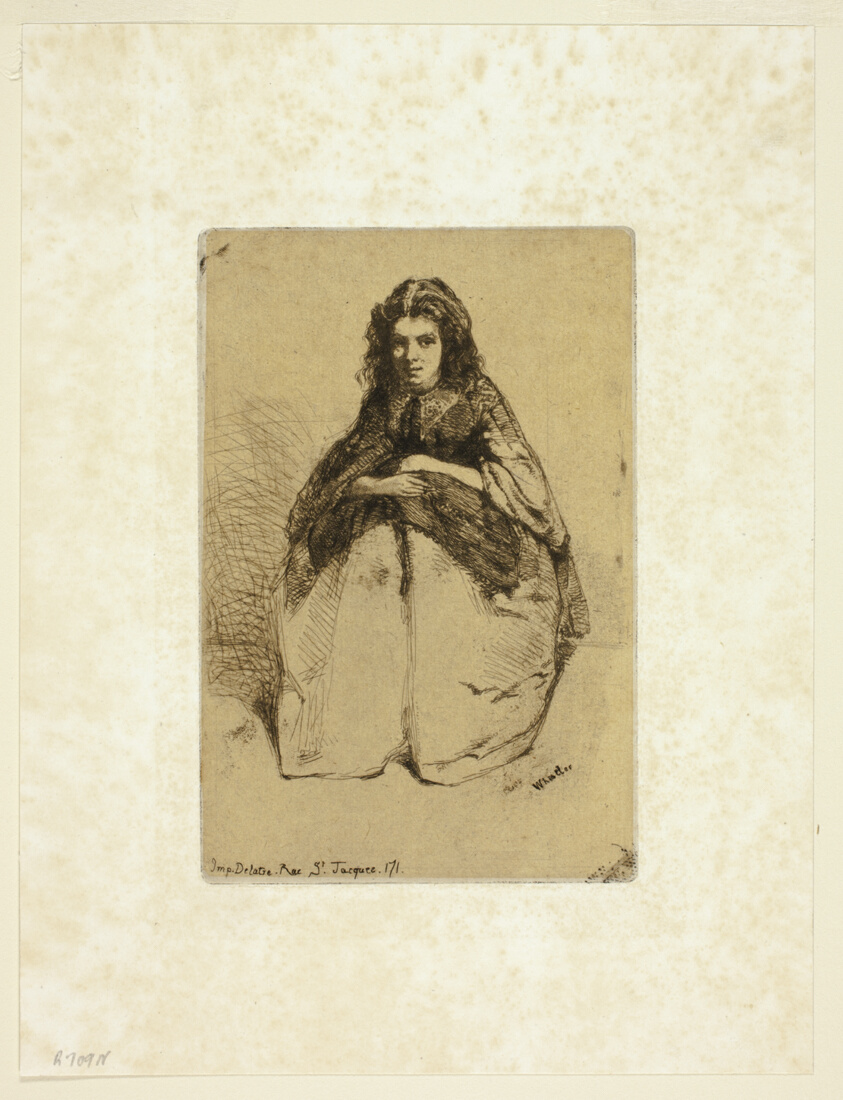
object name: Print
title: Fumette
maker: James McNeill Whistler (American, 1834-1903)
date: 1858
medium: Etching with foul biting in black ink on tan China paper, laid down on ivory wove paper (chine collé)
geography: United States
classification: etching; foul biting; print; prints and drawing; paper